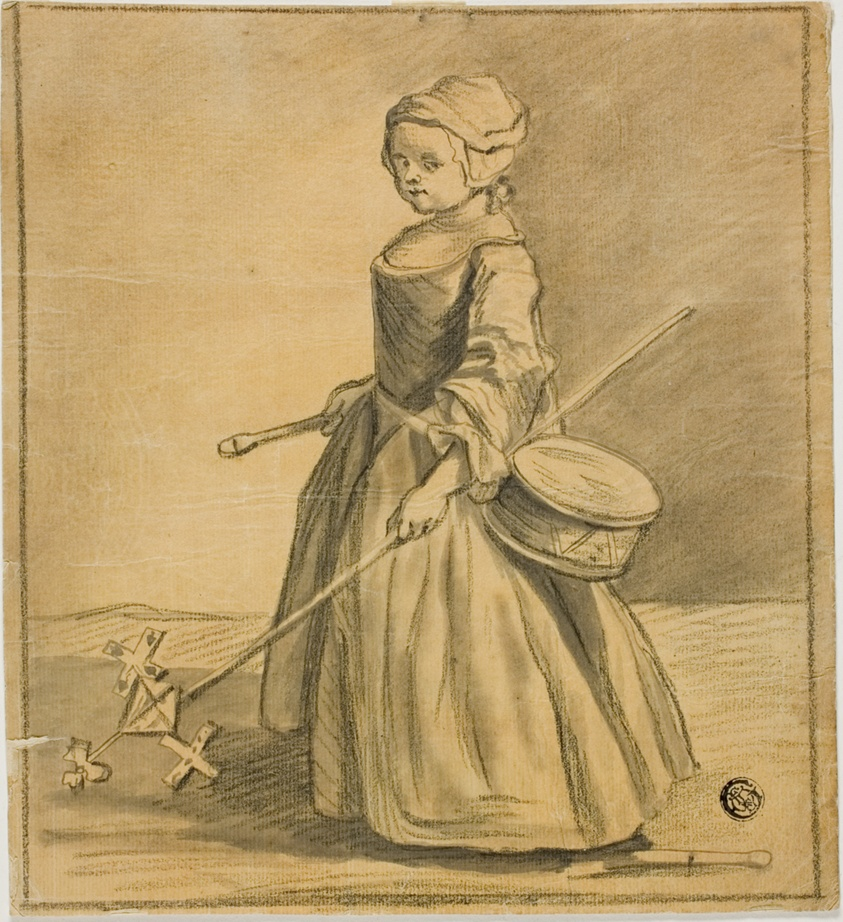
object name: Drawing and Watercolor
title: Girl Playing with Drum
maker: After Jean Baptiste Siméon Chardin; French, 1699-1779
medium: Black chalk with brush and gray wash, on tan laid paper, laid down on buff laid paper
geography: France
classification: ink or chalk wash; drawings (visual works); prints and drawing